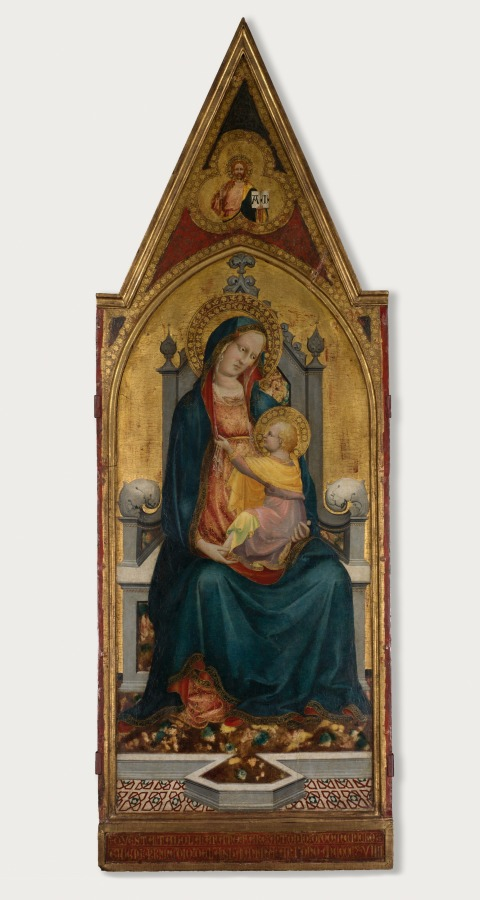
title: Virgin and Child Enthroned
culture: Italy, Tuscany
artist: Battista di Biagio Sanguigni (Italian, active 1393–1451)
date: 1419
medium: tempera and gold on wood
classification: Painting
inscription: Inscribed at bottom: "QUESTA TAVOLA AFATO FARE ANTONIO DI DOMENICHO / GIUGNI P[ER] RIMEDIO DELA SUA ANIMA ANI DNO. MCCCCXVIIII"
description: Rather than depicting a single moment in time, this gold-ground painting symbolically encapsulates Christ. Seated on a rich throne, the monumental Virgin holds the Christ child. Above, the risen Christ is seen in heaven holding a book, inscribed with the alpha and omega, the first and last letters of the Greek alphabet, signifying Christ’s role as the beginning and end of all things. The Italian inscription states: "This painting was made for Antonio di Domenicho Giugni for the repose of his soul, the year of our Lord 1419." In the 1300s, Italian painting focused on the heavenly aspects of Christian faith in order to convey abstract religious concepts. Depicted as specimens of formal beauty, sacred figures were placed against an ethereal gold background. Within a hundred years, artists began to highlight the earthly aspects of sacred figures, placing them within naturalistic landscapes. In this newer style of painting, the approachability of sacred figures fostered devotion among the faithful.